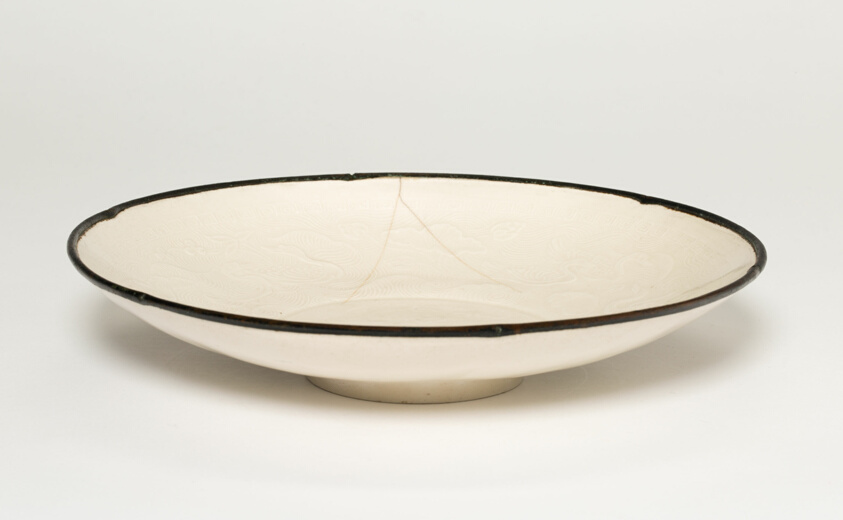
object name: Vessel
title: Shallow Bowl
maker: China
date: Song dynasty (960–1279)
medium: Ding ware, with low foot and foliate rim, fitted with metal band. Decoration molded in relief: center, lotus on waves, elaborate design on sides of ducks swimming on combed waves among lotus & other water plants, outer border of key fret. Fine white porcelain. Ivory white glaze, worn in places, soft in texture, with gummy drops outside, and within footrim; mouth rim bare.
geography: China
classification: porcelain; asian art; ceramics